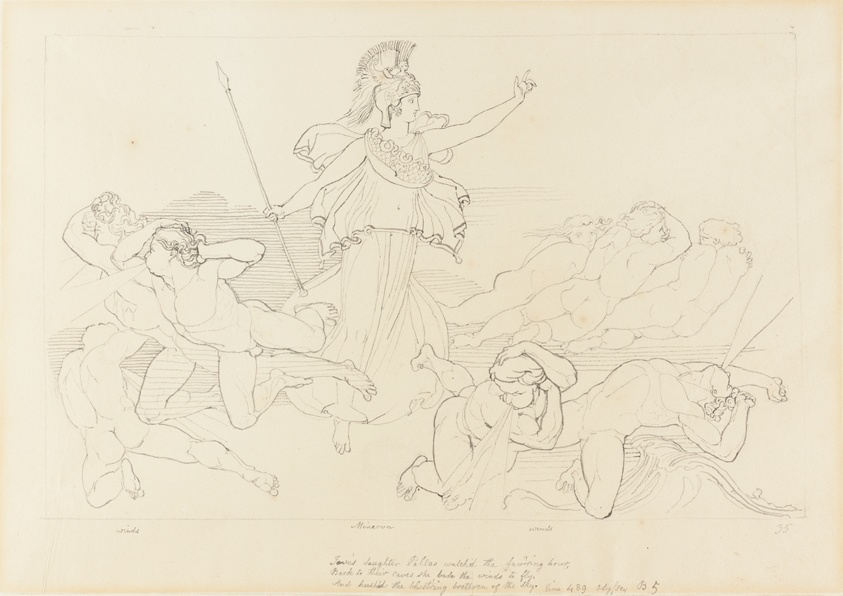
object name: Drawing and Watercolor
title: Athena and the Winds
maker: John Flaxman, II; English, 1755-1826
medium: Pen and black ink, over traces of graphite, on tan wove paper, laid down on cream wove paper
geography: England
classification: pen and ink drawings; drawings (visual works); prints and drawing